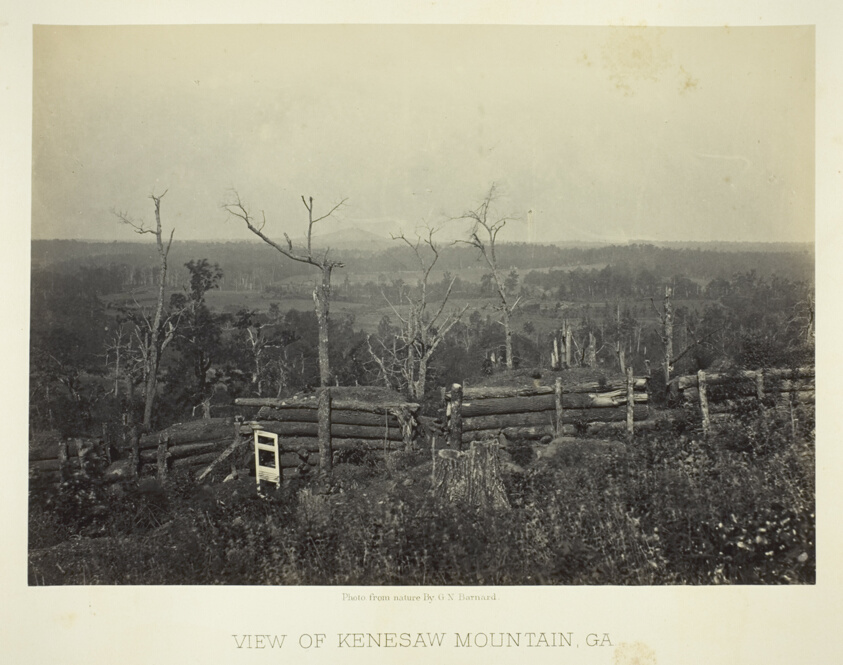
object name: Photograph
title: View of Kenesaw Mountain, Ga.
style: 19th century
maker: George N. Barnard (American, 1819–1902)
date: 1866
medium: Albumen print, plate 32 from the album "Photographic Views of the Sherman Campaign" (1866)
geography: United States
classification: albumen silver print; photographic process; photography; photograph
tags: Collected by Hugh Edwards, Sherman's Campaign 1866